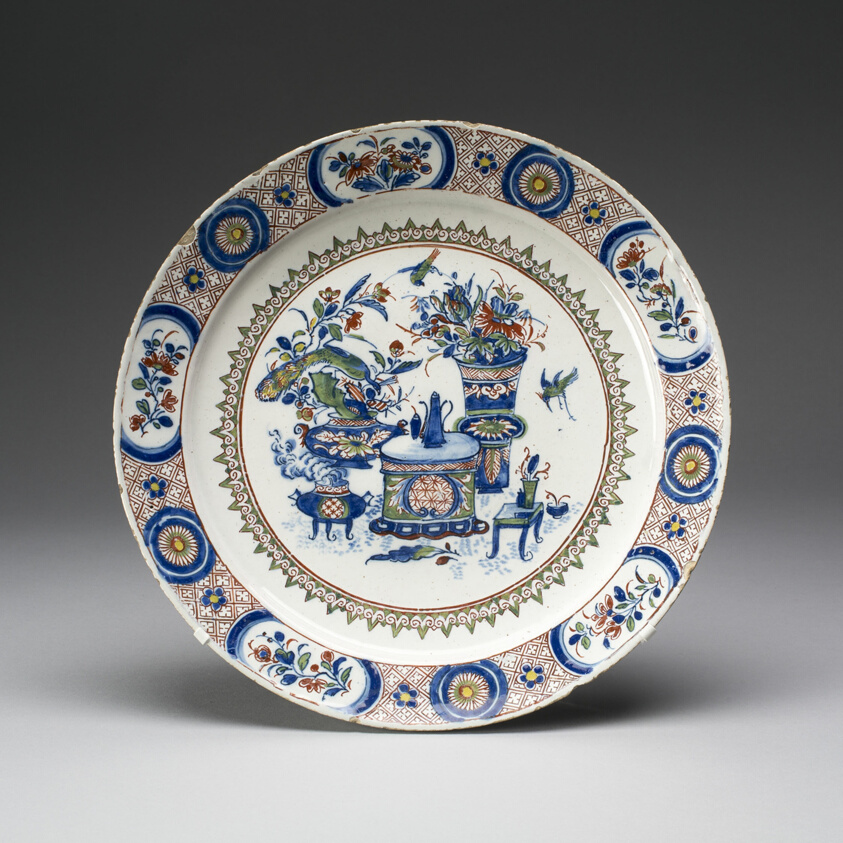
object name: Ceramics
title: Plate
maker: Delft, Netherlands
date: c. 1700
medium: Tin-glazed earthenware (Delftware)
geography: Delft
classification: plate (general, dish); dish (vessel); earthenware; tin-glazed ware; ceramics; european decorative arts